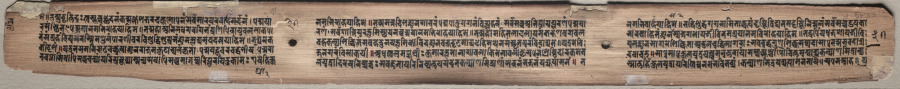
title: Text, folio 37 (verso) from a Gandavyuha-sutra (Scripture of the Supreme Array)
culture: Nepal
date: 1000–1100s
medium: ink on palm leaf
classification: Painting